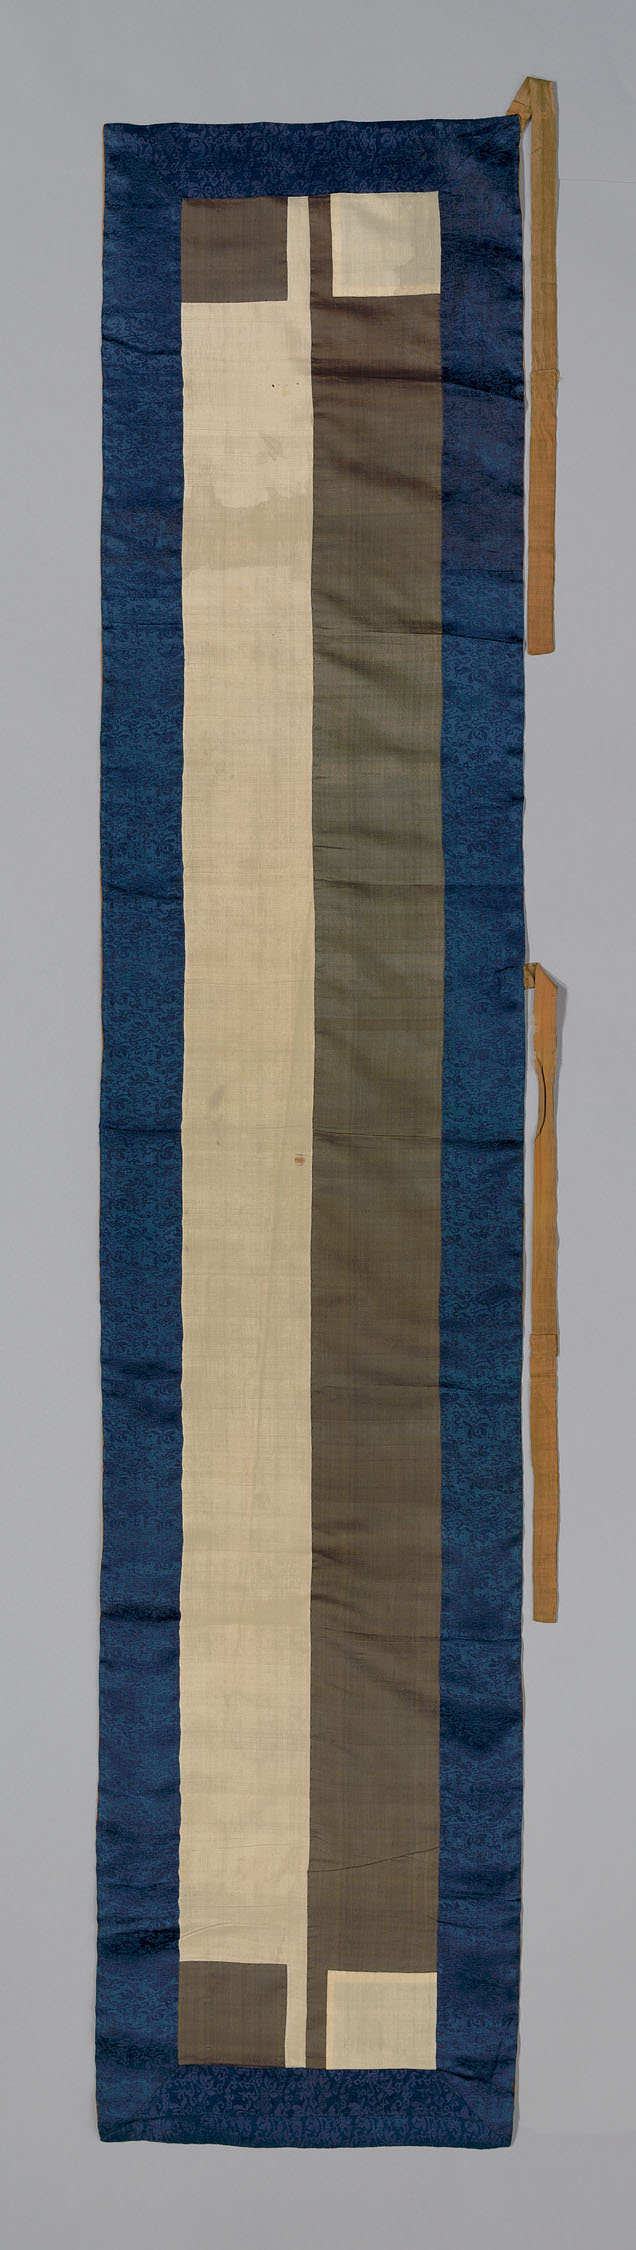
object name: Textile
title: Ôhi (Stole)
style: late edo, Japanism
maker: Japan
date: Early or mid–19th century, Late Edo period (1789–1868)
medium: Silk; satin damask and plain weaves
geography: Japan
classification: textile; liturgical - buddhist; weaving